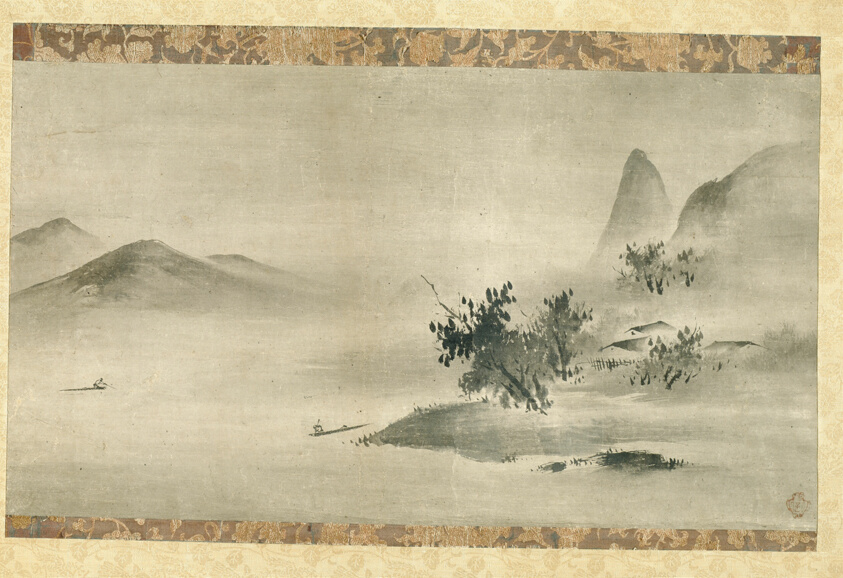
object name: Painting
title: Ink Landscape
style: Japanese (culture or style)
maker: Kano Motonobu (Japanese, 1476-1559)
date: Muromachi period, early 16th century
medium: Hanging scroll, ink on paper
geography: Japan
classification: hanging scroll; painting; asian art